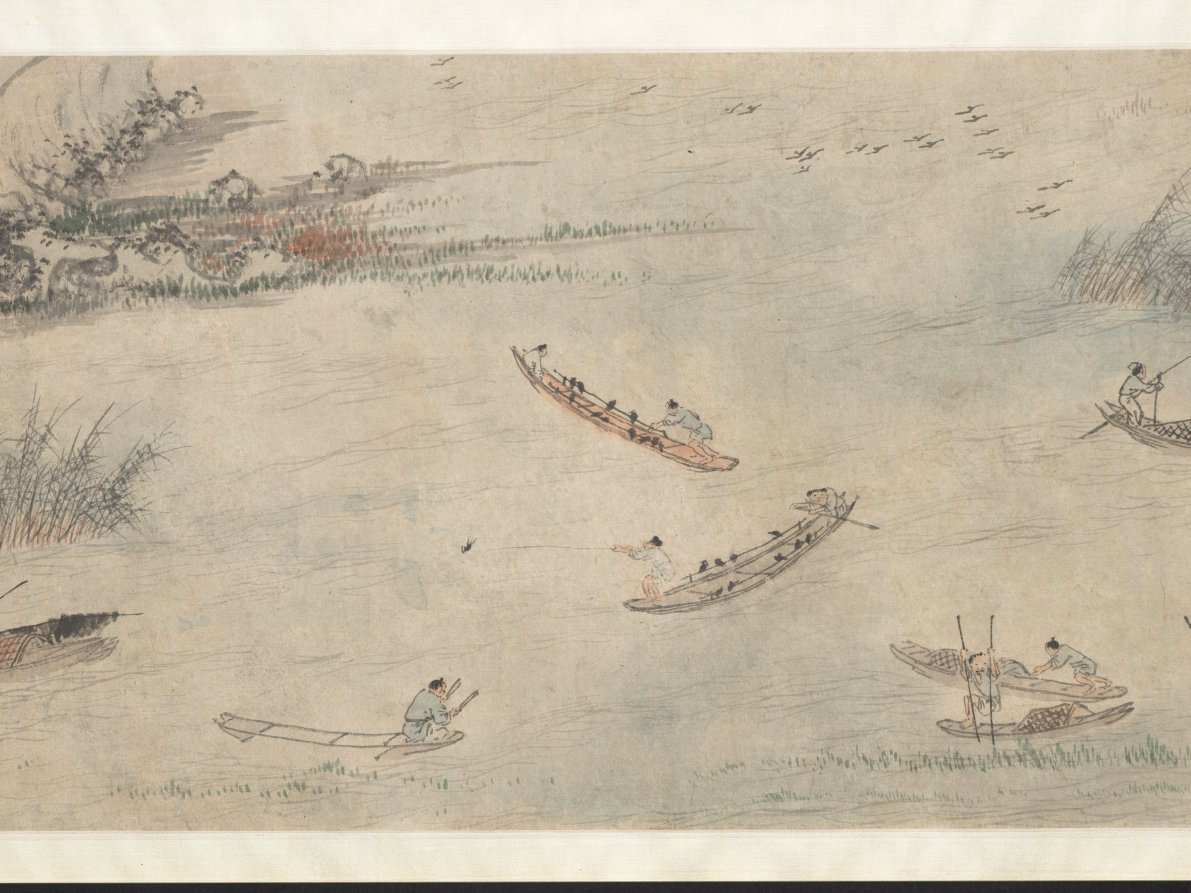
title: Fisherman's Joy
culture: China, Ming dynasty (1368–1644)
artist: Qian Gu (Chinese, 1508–c. 1578)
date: 1572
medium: Handscroll; ink and light color on paper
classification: Painting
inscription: Artist's inscription, signature, and seal: On the autumn day of the jen-shen year [1572], P'eng-ch'eng, Ch'ien Ku painted [this]. [seal] Hsüan-ch'ing shih. 2 colophons, both dated 1689, and 5 additional seals of Yün Shou-p'ing (1633-1690).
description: This painting has a scene showing two small crafts, each manned by two fishermen, practicing a traditional fishing method. In one of them, a man uses a bamboo pole to direct the movements of a cormorant bird sent into the water. Cormorant fishing, witnessed in some areas of the lower Yangzi River, appears in Zhe school paintings. Qian Gu may have borrowed these narrative figure scenes from Zhe school paintings, while his vantage point, brushwork, and soft tones align with the Wu school style. Scenes of fishermen appealed to urban and educated audiences who idealized the self-sufficient independence of fisherfolk.